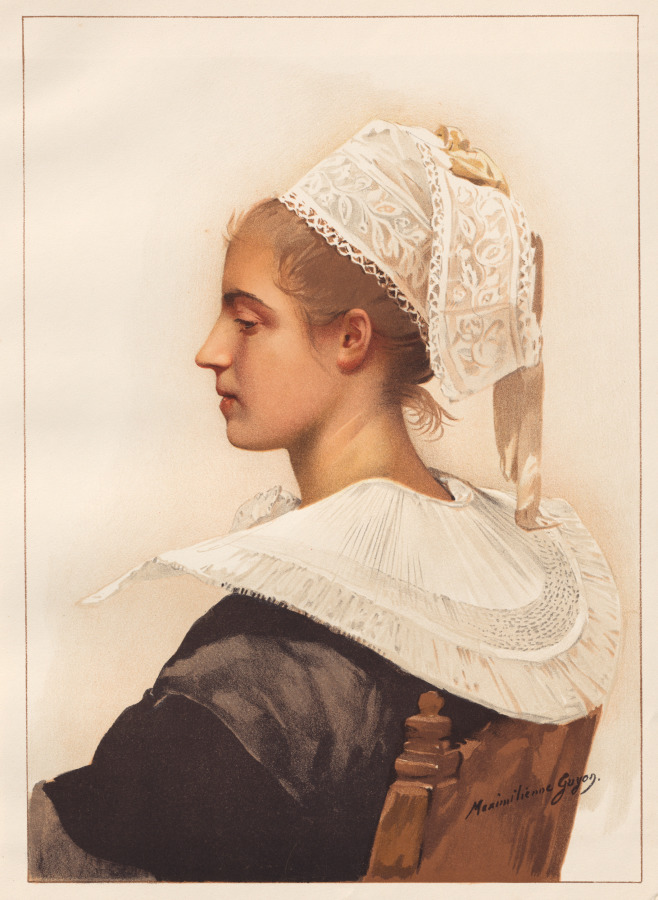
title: Maris Stella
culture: France, Paris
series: L'Estampe Moderne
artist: Maximilienne Guyon (French, 1869–1903)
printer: Imprimerie Champenois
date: 1899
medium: Color lithograph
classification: Bound Volume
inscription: In plate: lower right of image: Maximilienne Guyon.; lower right corner of sheet: blindstamp of l'Estampe Moderne (Lugt 2790)